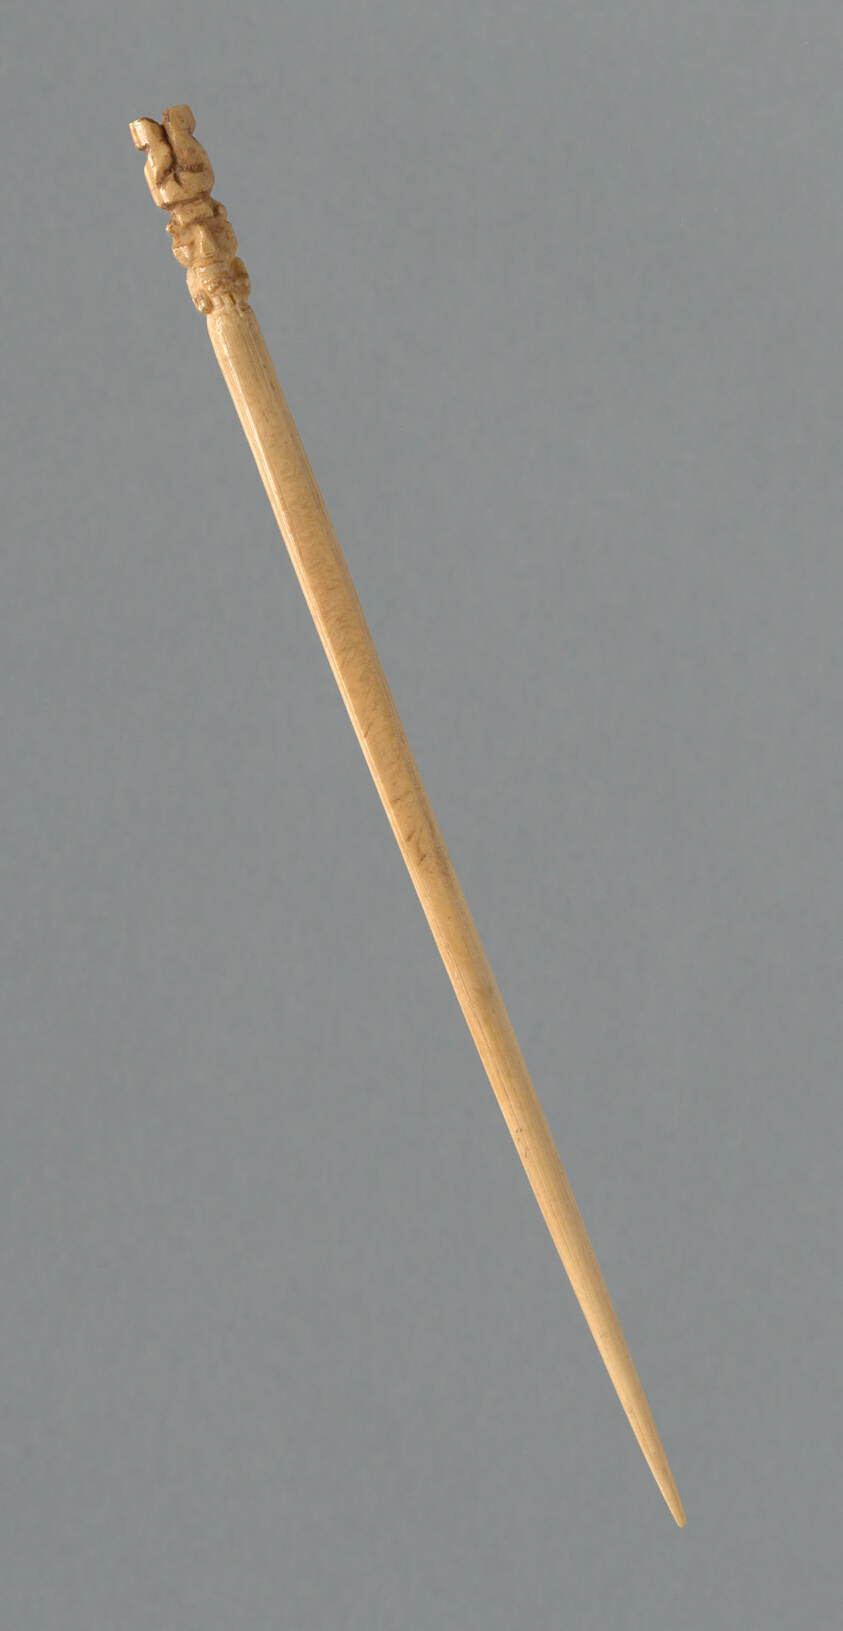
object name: non-art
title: Bone Pick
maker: Peru, Probably central coast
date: 1000/1476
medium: Bone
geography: Peru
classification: textile; weaving; textile working equipment; accessories (object genre)